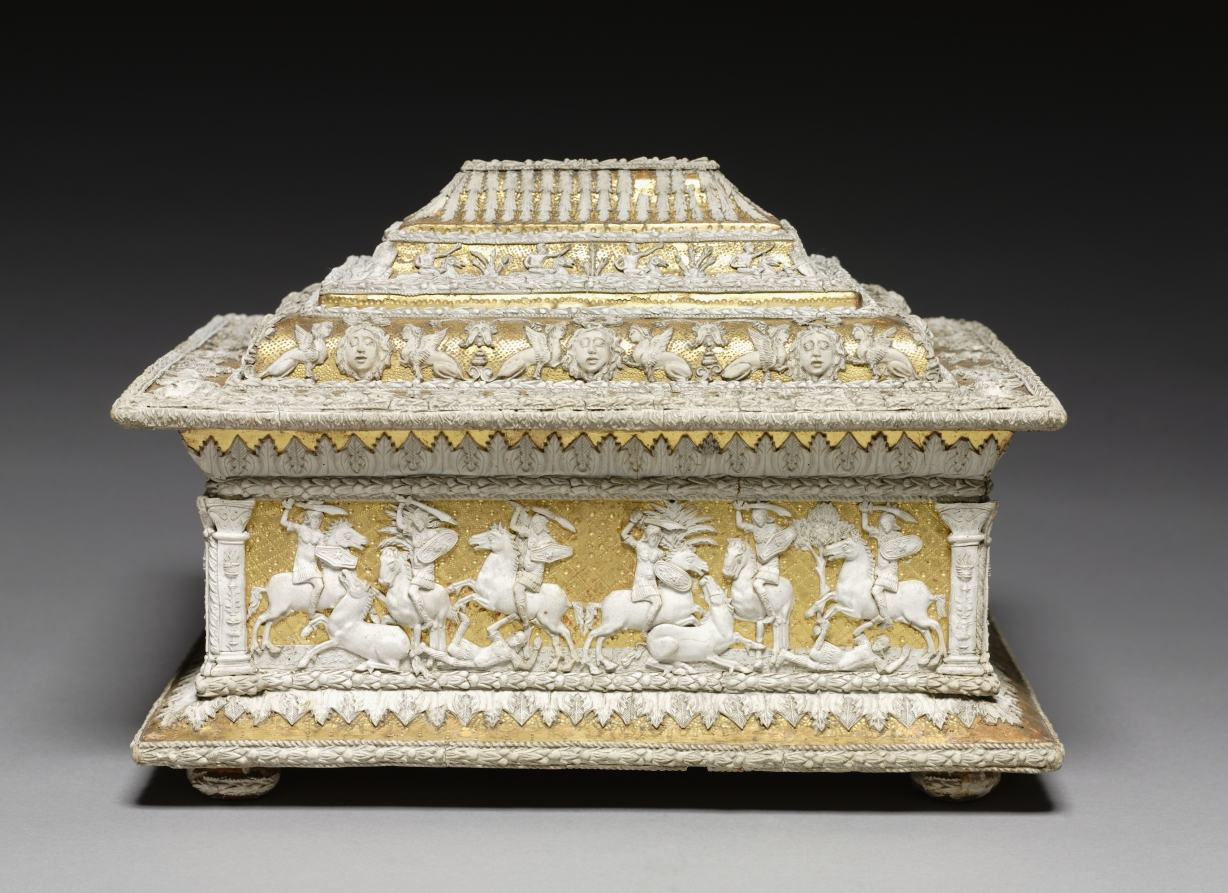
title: Box with Military Scenes from Antiquity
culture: Workshop of the Cleveland Casket (Italy), 16th century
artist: Workshop of the Cleveland Casket (Italian)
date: c. 1520–1530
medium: pastiglia on gilded wood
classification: Furniture and woodwork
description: This box features four military scenes from antiquity: an allegiance, a triumph, a battle, and an execution.